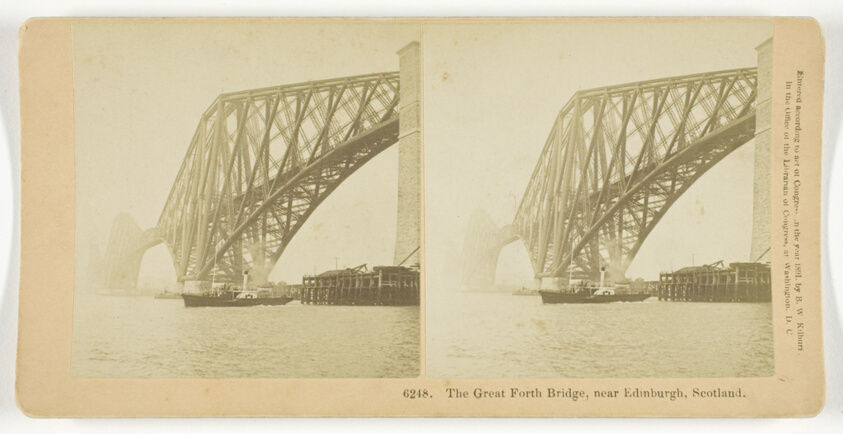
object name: Photograph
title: The Great Forth Bridge, Near Edinburgh, Scotland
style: 19th century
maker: B. W. Kilburn; American, 1827–1909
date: 1891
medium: Albumen silver print, stereo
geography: United States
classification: stereograph (albumen); albumen silver print; photographic process; photography; photograph